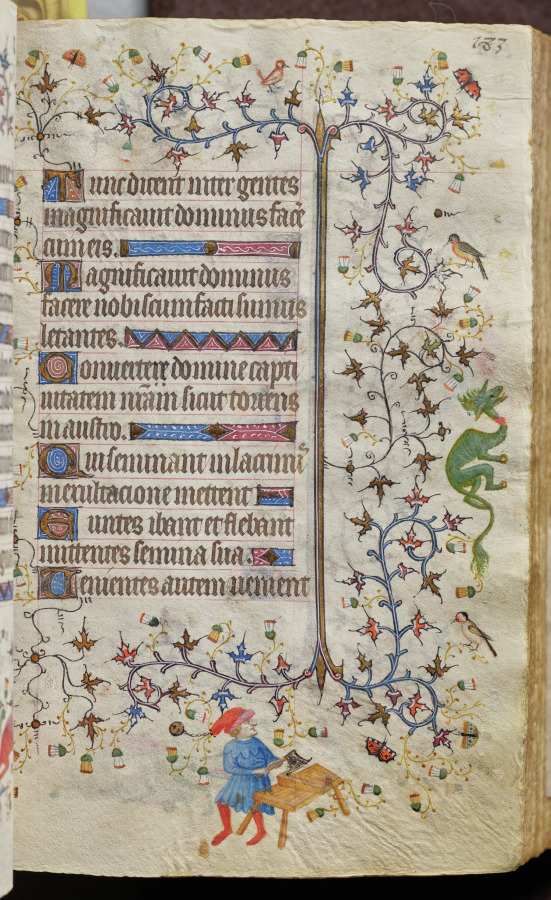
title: Hours of Charles the Noble, King of Navarre (1361-1425): fol. 92r, Text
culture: France, Paris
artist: Master of the Brussels Initials and Associates (French)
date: c. 1405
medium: ink, tempera, and gold on vellum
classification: Bound Volume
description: This precious volume was obviously highly prized by its owner, the French-born King of Navarre, who had his coat of arms painted on no less than twenty folios. Rather than directly commissioning this manuscript from a specific workshop, it seems that Charles the Noble acquired his book of hours -- perhaps ready-made for the luxury market -- while on a trip to Paris in 1404-05. A collaborative effort, six painting styles are evidenced within the pages of this codex, those of two Italians, two Frenchmen, and two Netherlanders. The painter who was responsible for the planning and decoration of the book, and who produced seventeen of the large miniatures, was a Bolognese artist known as the Master of the Brussels Initials. His principal assistant, responsible for most of the borders, was a Florentine who signed his name "Zecho" da Firenze on folio 208 verso.